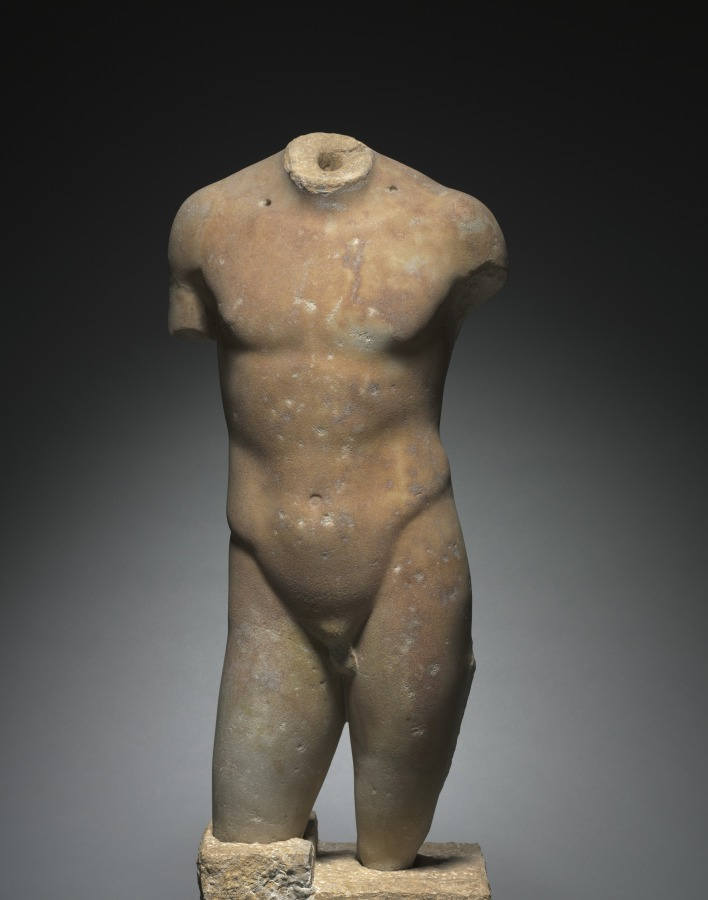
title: Torso of a Youth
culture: Greece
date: c. 150–100 BCE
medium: marble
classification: Sculpture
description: The exceptional workmanship suggests that this sculpture was carved by a Greek sculptor. Its incomplete state of preservation makes precise identification difficult, but it was most likely an Apollo or Dionysos, modeled in the soft, somewhat effeminate style of Praxiteles. The museum’s Apollo Sauroktonos is a useful parallel. The two drill holes in the upper chest are ancient and were possibly used to support separate long tresses of hair. The sculpture may well be a copy of a fourth-century original.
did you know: It was common practice in the 1700s and 1800s to attach new heads or limbs to fragmented ancient statues like this one.